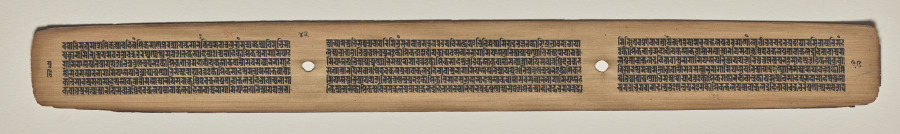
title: Text, Folio 42 (verso), from a Manuscript of the Perfection of Wisdom in Eight Thousand Lines (Ashtasahasrika Prajnaparamita-sutra)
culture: Eastern India, Bihar, Vikramashila Monastery. Painting: Nepal, Kathmandu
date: Sunday, September 14, 1119 (year 239 of the Newar Samvat in the month of Ashvina)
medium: gum tempera and ink on palm leaves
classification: Painting